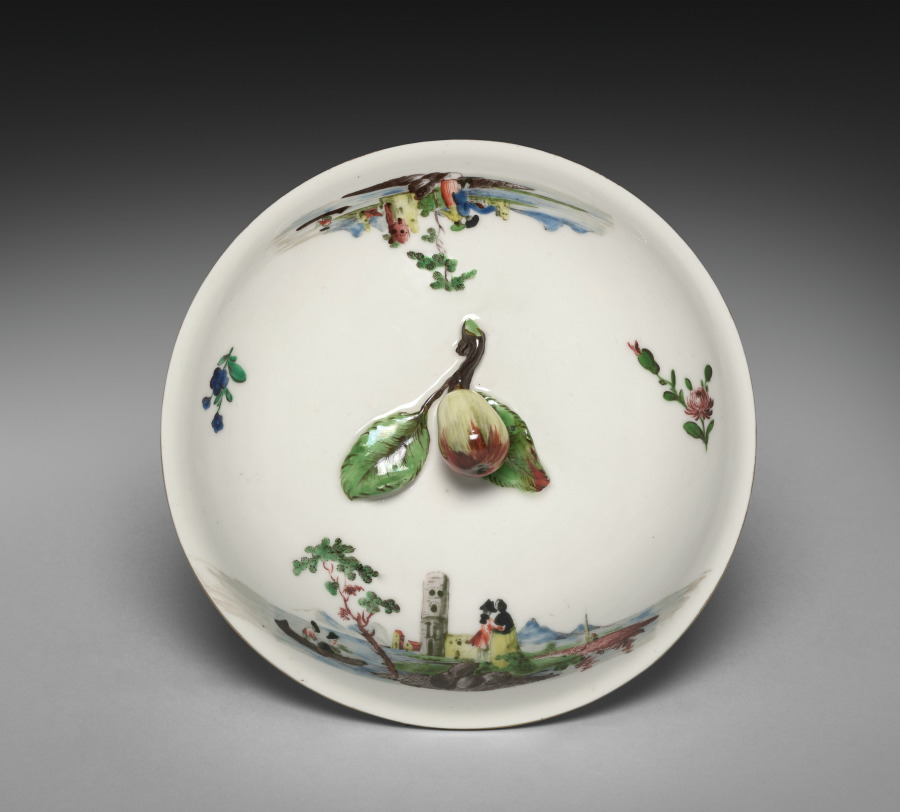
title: Food Warmer (Veilleuse) [Food Container Cover]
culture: Germany, Nymphenburg, 18th century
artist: Meissen Porcelain Factory (German, est. c. 1710)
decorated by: probably by Georg Christoph Lindemann (German)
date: c. 1758–1760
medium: porcelain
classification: Ceramic